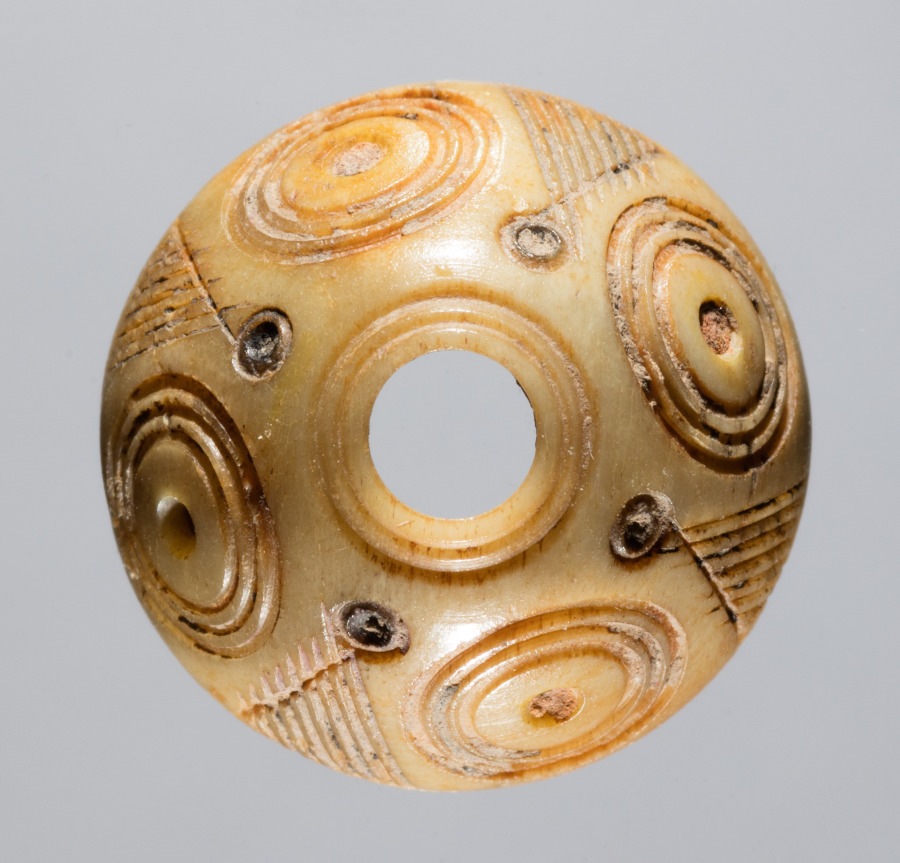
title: Spindle Whorl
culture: Iran, early Islamic period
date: 700s - 900s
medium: bone, incised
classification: Spindle Whorl